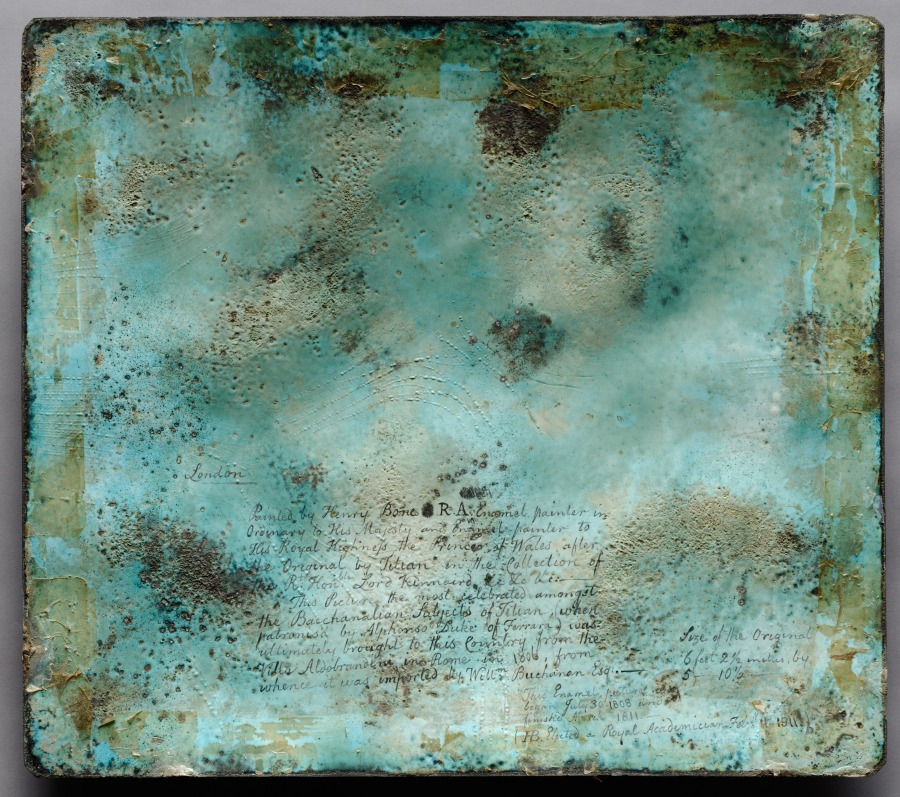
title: Bacchus and Ariadne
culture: England, 19th century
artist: Henry Bone (British, 1755–1834)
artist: after Titian (Italian, c. 1488–1576)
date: 1808–11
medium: enamel, in original gilt-wood and gesso carved frame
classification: Miniature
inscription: Signed and dated H Bone, 1811 on the recto (on the urn, lower left), inscribed on frame mat at bottom right: ENAMEL HBONE, and signed, dated and inscribed in full on the counter-enamel "painted by Henry Bone R.A. Enamel painter in Ordinary to His Majesty and Enamel painter to His Royal Highness the Prince of Wales, after the Original by Titian in the Collection of the Rt: Honble: Lord Kinnaird &c &c &c.____ This Picture the most celebrated amongst the Bacchanalian Subjects of Titian (when patronis'd by Alphonso Duke of Ferrara) was ultimately brought to this Country from the Villa Aldobrandini in Rome in 1806, from whence it was imported by Willm. Buchanan Esq.____ Size of the Original 6 feet 2 inches, by 5 ---- 10 ---- This Enamel picture w[as] began July 30th 1808 and finish'd March 1811. ___ (HB. Elected a Royal Academician Feby. 11th 1811)"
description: Henry Bone devoted three years to creating this work, a tremendous technical achievement and the largest enamel on copper that had ever been made. The painstaking process required each application of color to be fired at a different temperature in the kiln. The enamel exactly reproduces Titian’s Bacchus and Ariadne (now in the National Gallery, London), an early sixteenth-century Italian masterpiece that had recently come into an English collection. The elaborate carved and gilded wood frame was specially designed for the work, an indication of the cultural value placed on great enamel reproductions of famous paintings. Bone was unable to show his masterwork at the annual Royal Academy exhibition in 1811 because the Prince of Wales had asked to see it. When the prince decided not to purchase it, Bone issued more than 4,000 tickets for visitors to view the work in his studio.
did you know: Henry Bone was known for his enamel paintings created through a laborious process of fusing painted glass to copper and firing at controlled temperatures.